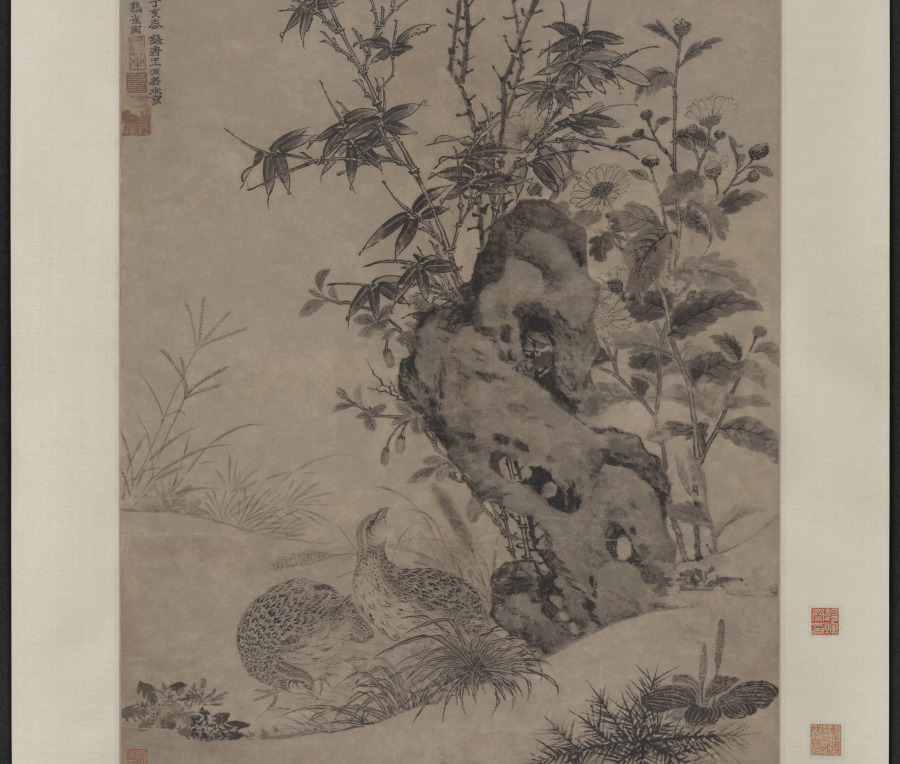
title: Quails and Sparrows in an Autumn Scene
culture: China, Yuan dynasty (1271-1368)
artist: Wang Yuan (Chinese, c. 1299-after 1366)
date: 1347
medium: hanging scroll, ink on paper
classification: Painting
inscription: 至正丁亥春 錢塘王淵若水寫秋景鶉雀圖 [印] 澹轩; [印] 若水; [印] 墨妙筆精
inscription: 翦翦輕風搖翠葆，團團清露滴金叢。 劍南畫手今何在，冷落賓榔枸杞新。 鐵篴 [印] 杨维桢印; [印] 廉夫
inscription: 1 inscription and 10 seals of the Qianlong emperor (r. 1736-95)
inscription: 4 seals of Zhang Heng 張珩 (1915-1963)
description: The flower-and-bird subjects here are depicted in a meticulous manner, echoing the academic tradition but translating the customarily colored images to plain monochrome. Fine ink lines combined with carefully graded washes define the contours and give subtle modeling to the natural forms. Wang Yuan excelled in flower-and-bird subjects as well as landscape and figure paintings. A child prodigy, he was instructed by the great Yuan master Zhao Mengfu at an early age.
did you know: Wang Yuan was from Qiantang, today’s Hangzhou in eastern China.